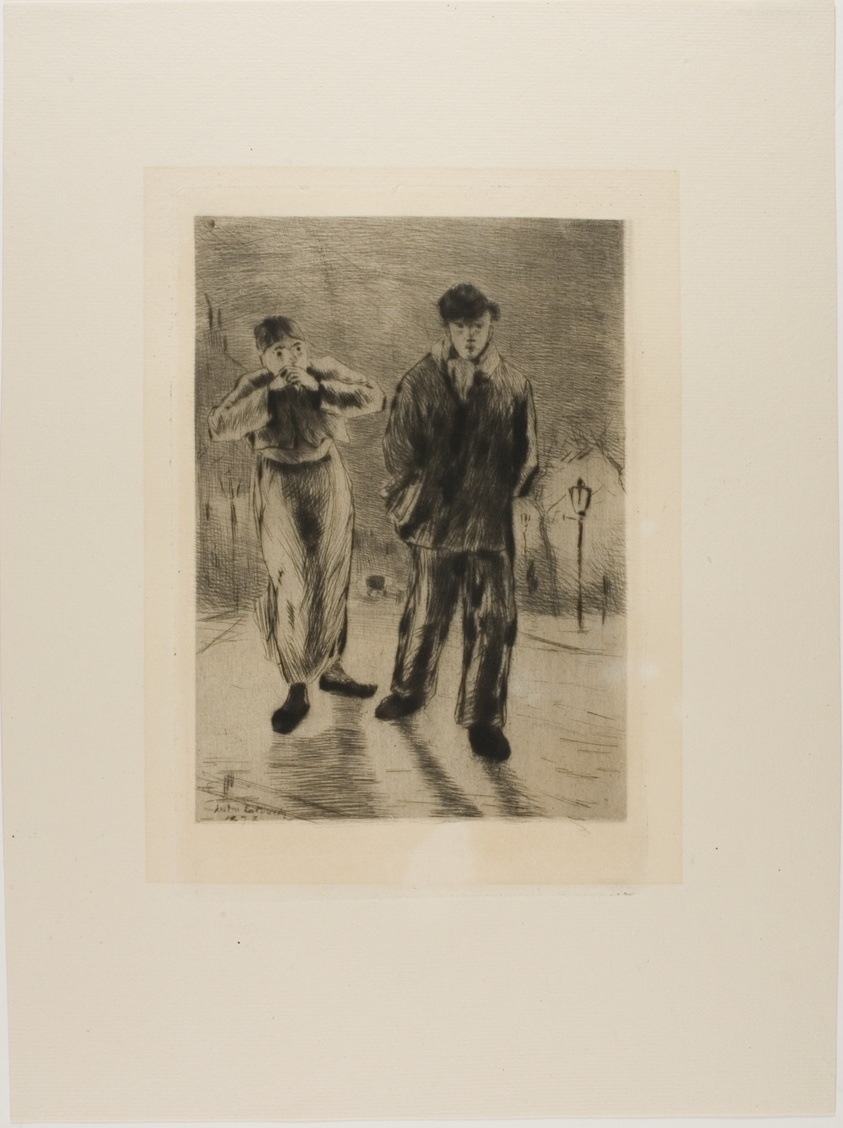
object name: Print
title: Plate from l'Assommoir (two boys on gaslit street)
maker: Gaston La Touche (French, 1854-1913)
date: 1878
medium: Drypoint and plate tone on ivory laid paper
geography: France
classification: drypoint; print; prints and drawing